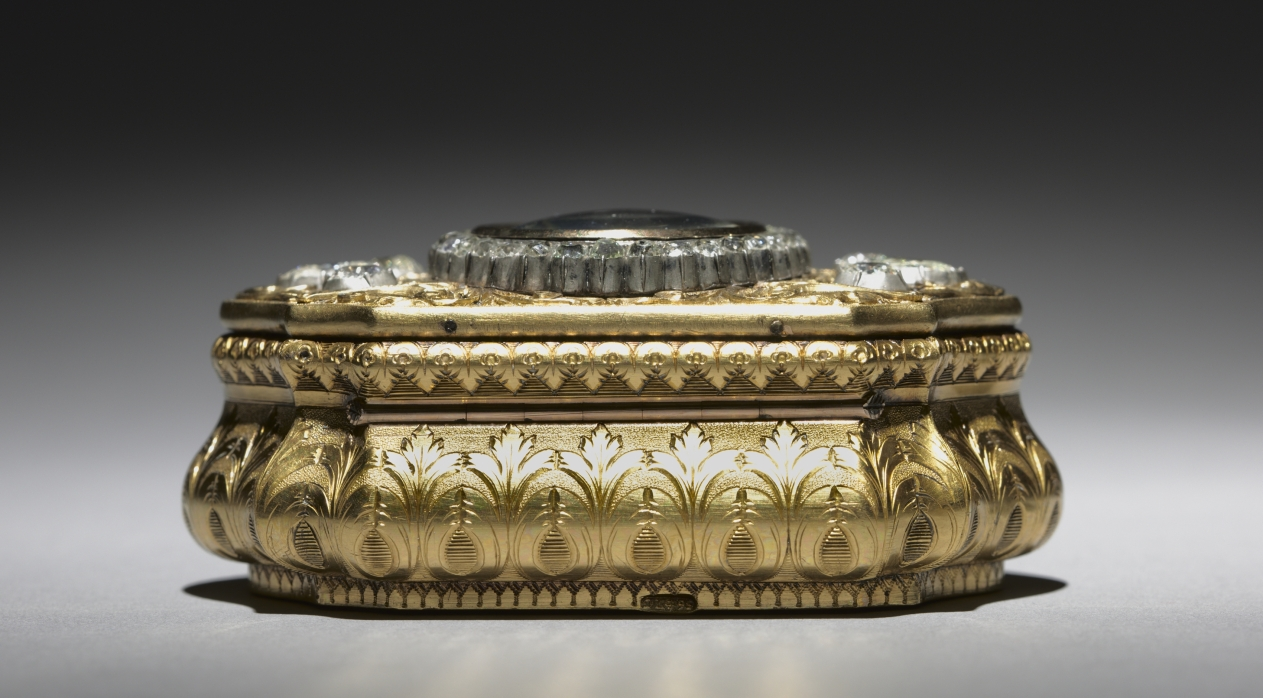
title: Box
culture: Switzerland, Neufchatel, 19th century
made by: Goffert (Russian)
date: c. 1850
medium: gold set with diamonds around a miniature of Tsar Alexander III (1845-1894)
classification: Miscellaneous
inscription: miniature signed in Russian: " " (Goffert).